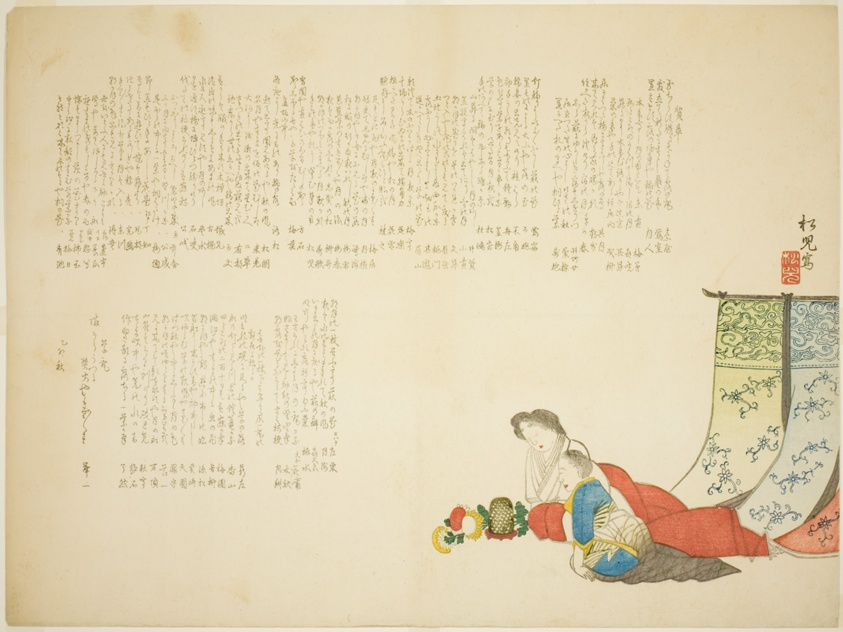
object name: Print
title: Two Ladies Looking at an Insect Cage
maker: Shoji (Japanese, active 19th century)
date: 1855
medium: Color woodblock print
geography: Japan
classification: print; asian art